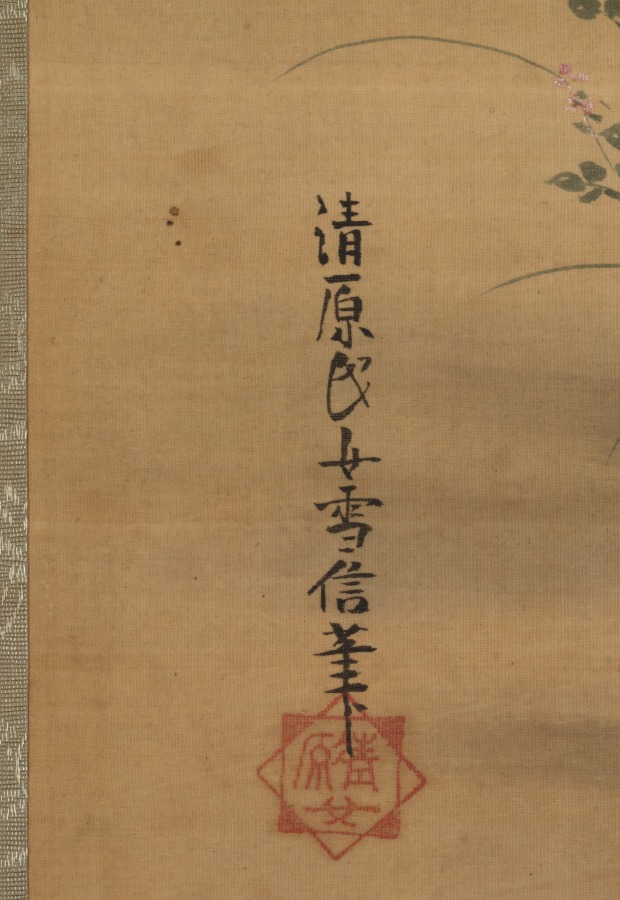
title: Minamoto no Nakakuni Visits Lady Kogō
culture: Japan, Edo period (1615–1868)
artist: Kiyohara Yukinobu (Japanese, 1643–1682)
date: late 1600s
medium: one of a triptych of hanging scrolls; ink and color on silk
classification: Painting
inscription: 款記「清原氏女雪信筆」/「清原女」朱文八角印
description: Kiyohara Yukinobu was one of Japan's earliest and most talented female painters. Kiyohara preferred Japanese-style painting techniques and subjects. Her work depicts the scenery and history of her native land. In addition to the tonalities of ink, she applied a delicate range of colors that help identify the seasons, an important theme in Japanese life and culture.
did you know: This nocturnal autumnal scene is the left part of a triptych presenting an episode from The Tale of the Heike.